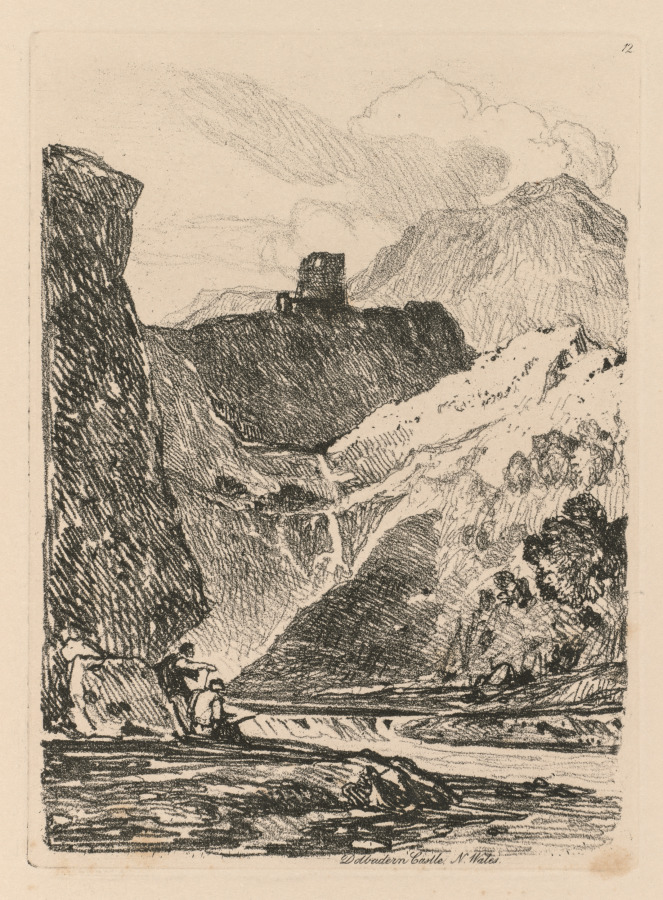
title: Liber Studiorum: Plate 12, Dolbadern Castle, Llanberris Lake, North Wales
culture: England, 19th century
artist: John Sell Cotman (British, 1782–1842)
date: 1838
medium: softground etching, from a bound volume containing 48 plates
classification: Bound Volume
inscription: In plate, within image, upper right: 12; in plate, below image: Dolbadern Castle, N. Wales